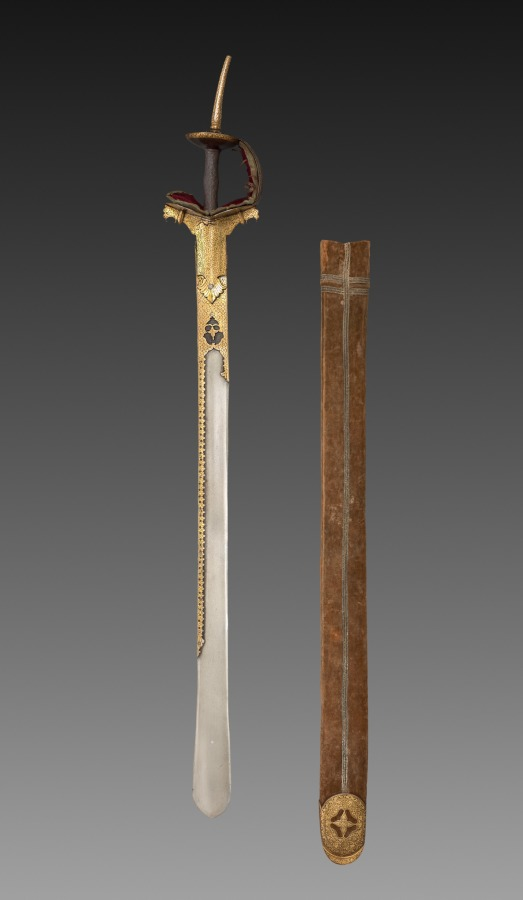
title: Sword with scabbard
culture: India, perhaps Deccan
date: 1700s–1800s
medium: Watered steel blade with iron hilt inlaid with gold; velvet lining with leather straps; wooden scabbard with velvet case and metallic threads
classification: Arms and Armor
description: Straight swords were typical of those used among military and aristocratic circles in the southern regions of the Deccan, in contrast to the curved swords favored by Central Asian equestrians. Increased contact between the Mughal north and the Deccan south during the 1600s led to the appearance of the Deccan-style sword in courtly portraits made during the time of Jahangir and Shah Jahan, and later.